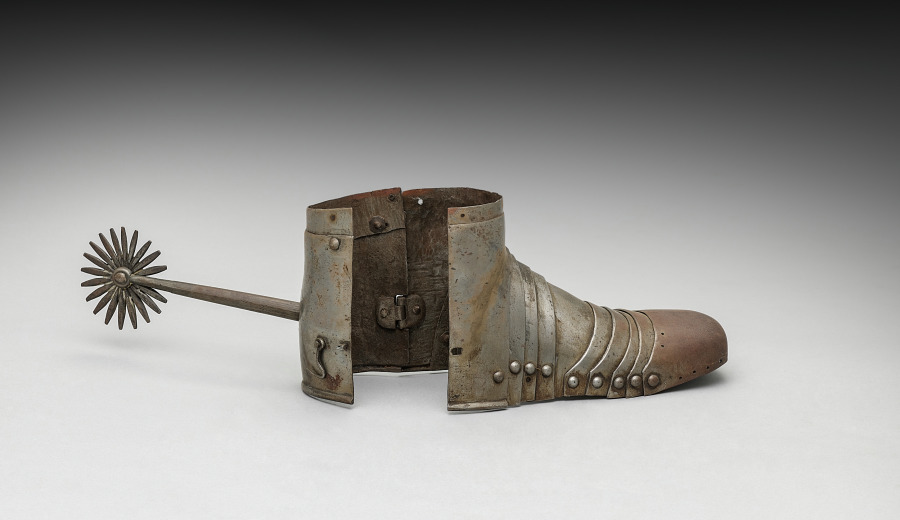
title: Left Sabatoun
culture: Germany, 19th century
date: 1801–1900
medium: steel with black paint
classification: Arms and Armor